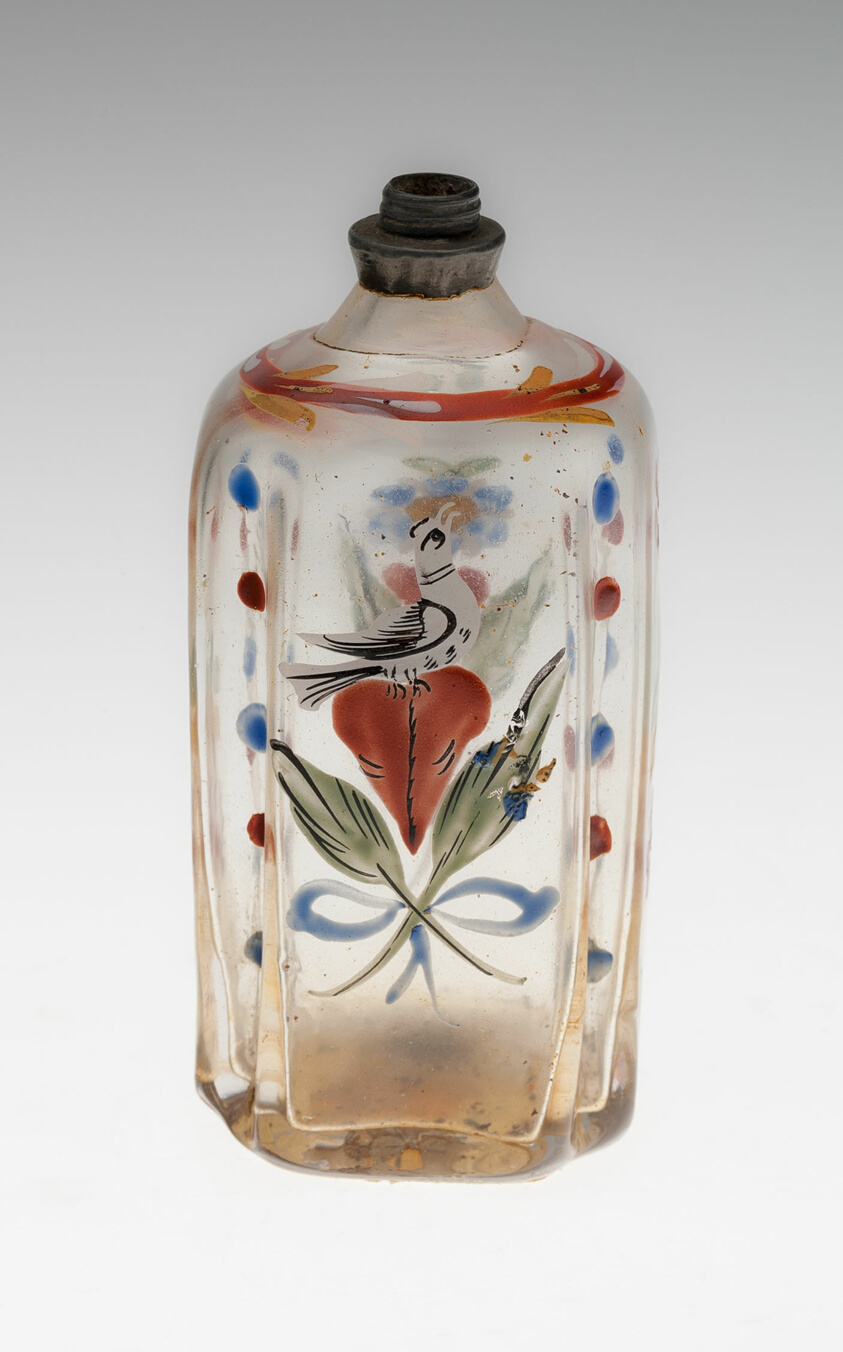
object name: Glass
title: Bottle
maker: Central Europe or Germany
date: 1750/1800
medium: Glass; free blown, tooled and enameled with metal mount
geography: Central Europe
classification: glass; european decorative arts